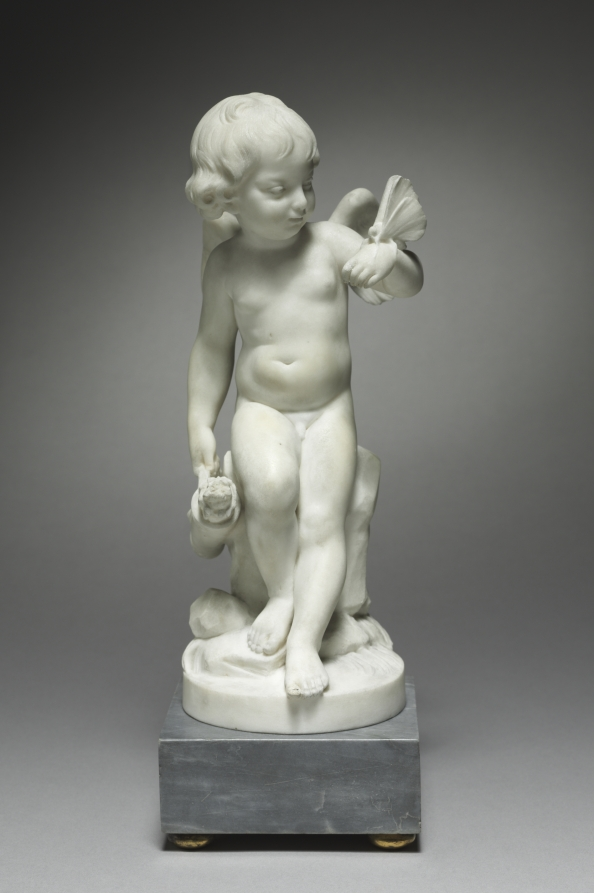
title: Fickle Love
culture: France, 19th century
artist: after Augustin Pajou (French, 1730–1809)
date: 1800s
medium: marble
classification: Sculpture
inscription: Signed Pajou f (fecit) 1787